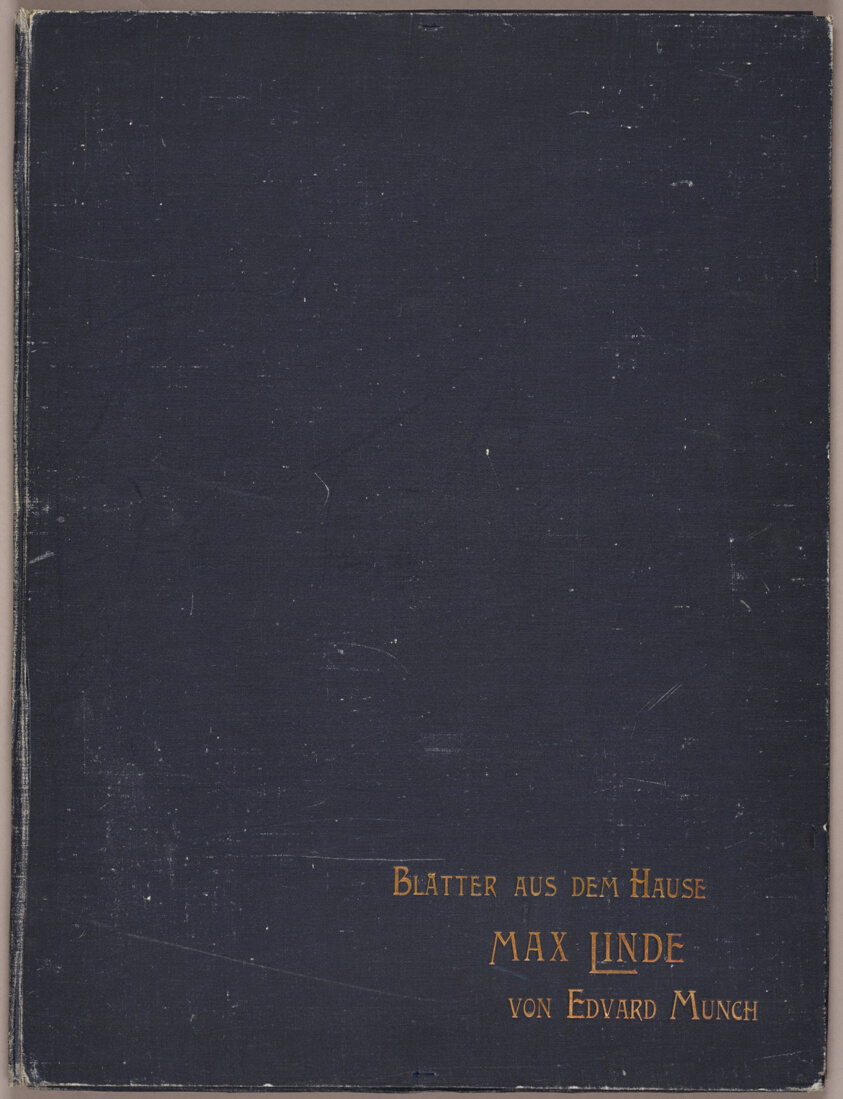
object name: Print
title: Portfolio cover and colophon page, from Max Linde's House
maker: Edvard Munch (Norwegian, 1863-1944)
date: 1902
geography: Norway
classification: print; prints and drawing